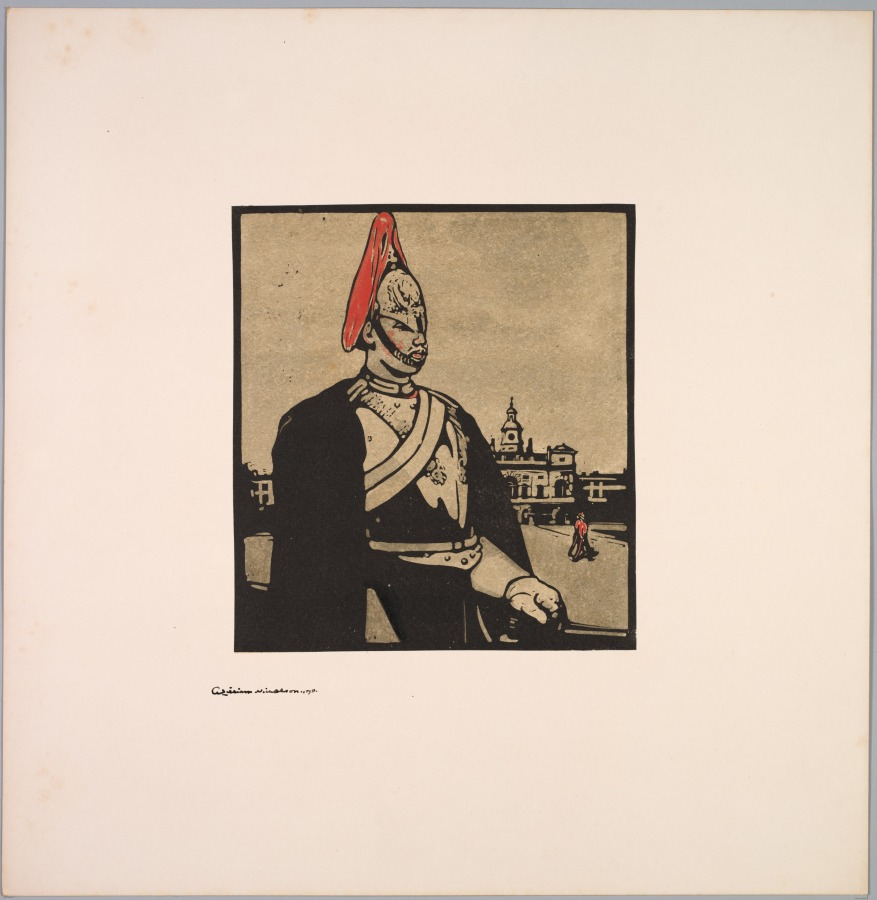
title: London Types: Guardsman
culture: England, 19th century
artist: William Nicholson (British, 1872–1949)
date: 1898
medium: woodcut hand-colored with watercolor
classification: Print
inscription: lower left margin, in black ink: William Nicholson - 1898 -